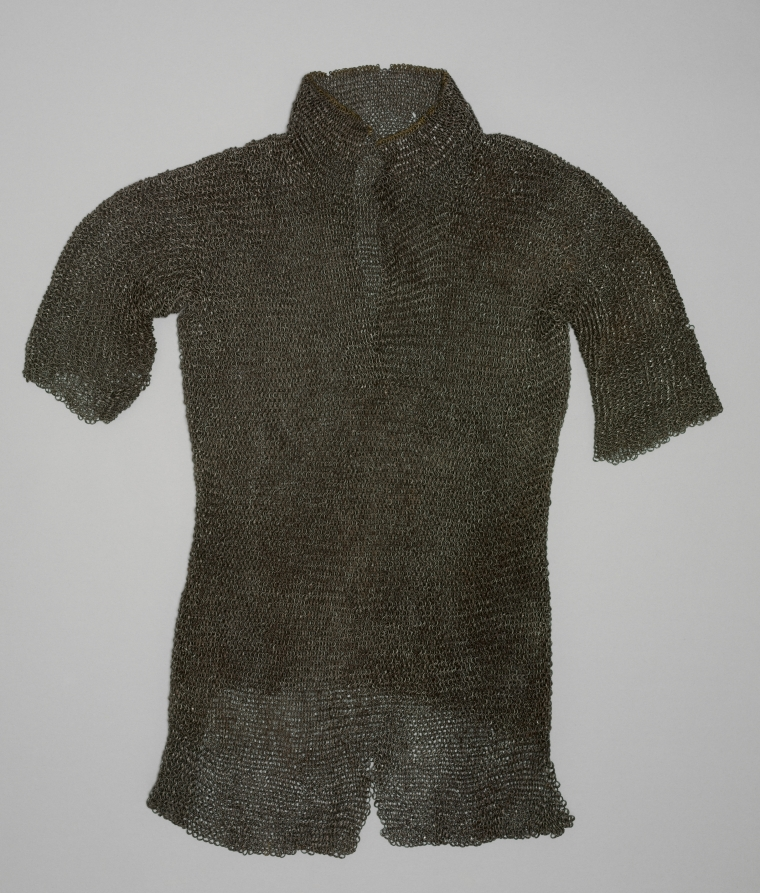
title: Hauberk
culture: European, 15th century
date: 1400s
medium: riveted steel rings; close woven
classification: Arms and Armor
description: By the early 1400s the hauberk was being worn as an accessory to supplement full or partial plate armor. It offered a secondary level of protection for areas not fully covered by plate armor, such as the armpit and groin. The making of chainmail involved the linking of thousands of small rings of steel.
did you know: Mail provided excellent defense against the sword cut, though only limited defense against crushing blows from weapons like the mace or the battle axe.